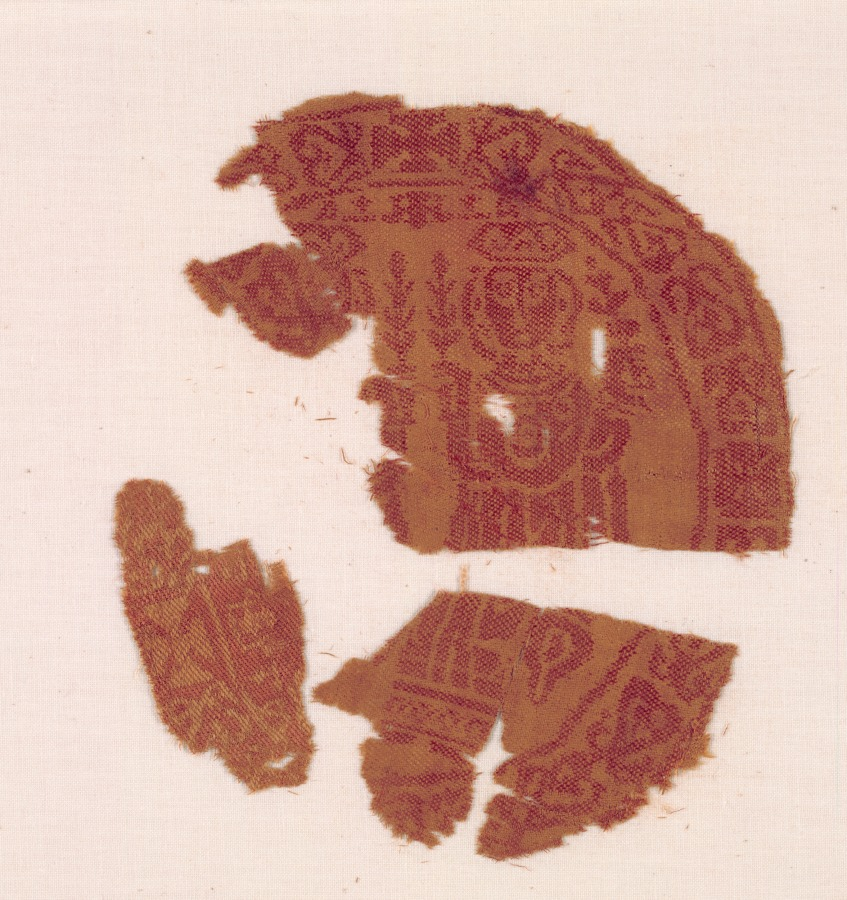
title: Fragments of Two Circular Segmenta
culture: Syria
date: 600s–700s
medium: compound twill weave, silk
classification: Textile